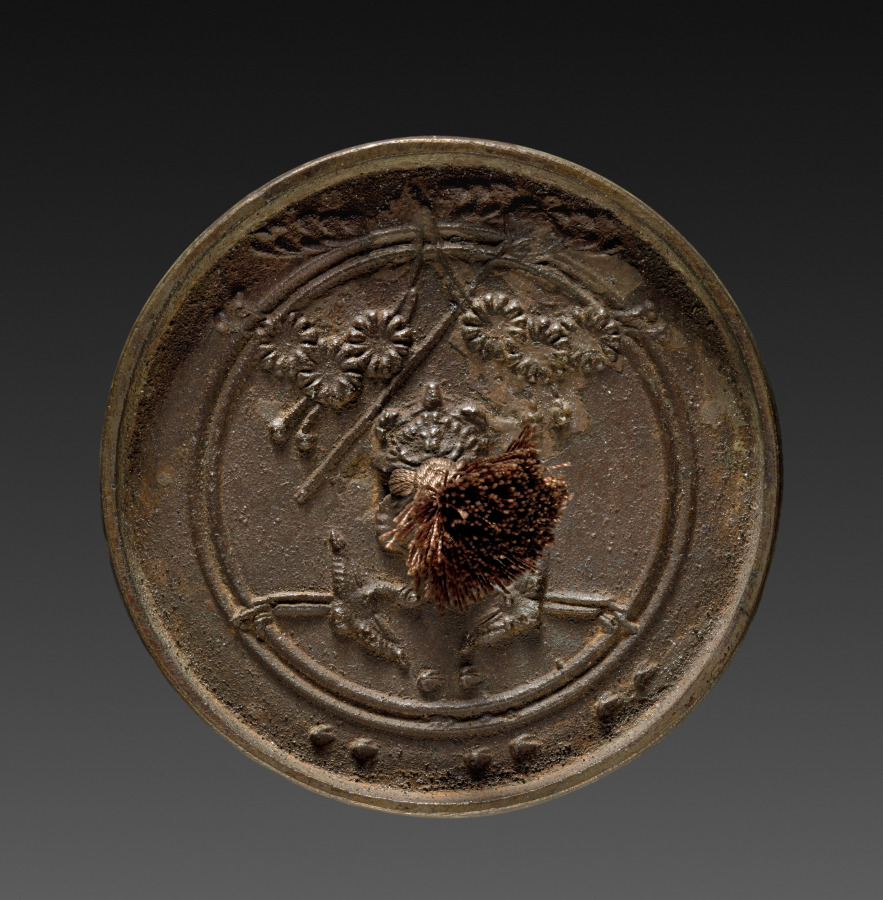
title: Mirror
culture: Japan, Edo period (1615–1868)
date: 1615–1868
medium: bronze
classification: Metalwork